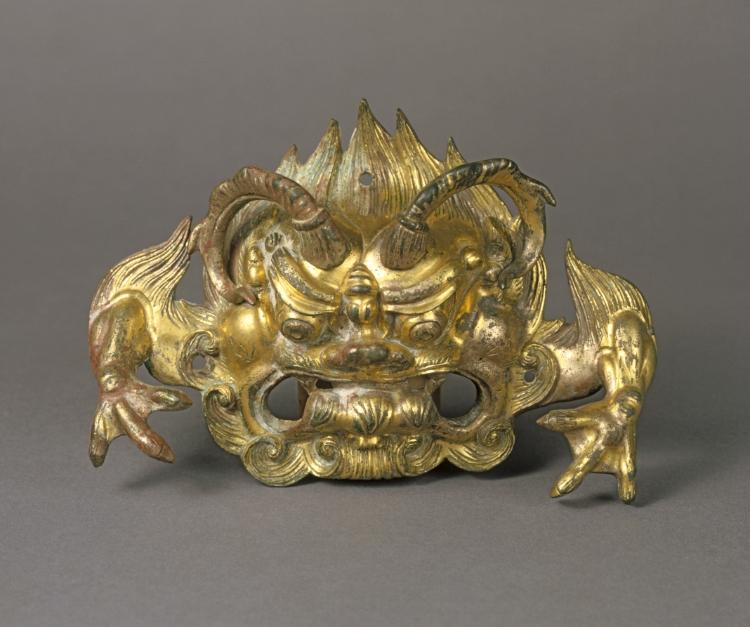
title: Monster Face: Door Ring Holder (Pushou)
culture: China, Henan province, Northern Dynasties period (386–581 CE)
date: 500s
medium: gilt bronze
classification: Metalwork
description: This gilt bronze Door Ring Holder is in the form of a monster head with curving horns, protruding eyes, three-clawed paws, curling beard, and flame-shaped hair. The tongue dangles from the mouth, in which the creature originally grasped a ring. While it had a practical function as a door knocker, the intimidating form could also frighten away both intruders and evil spirits.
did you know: Three rivet holes (one on the forehead and one by each limb) were used to nail the mask onto a door.